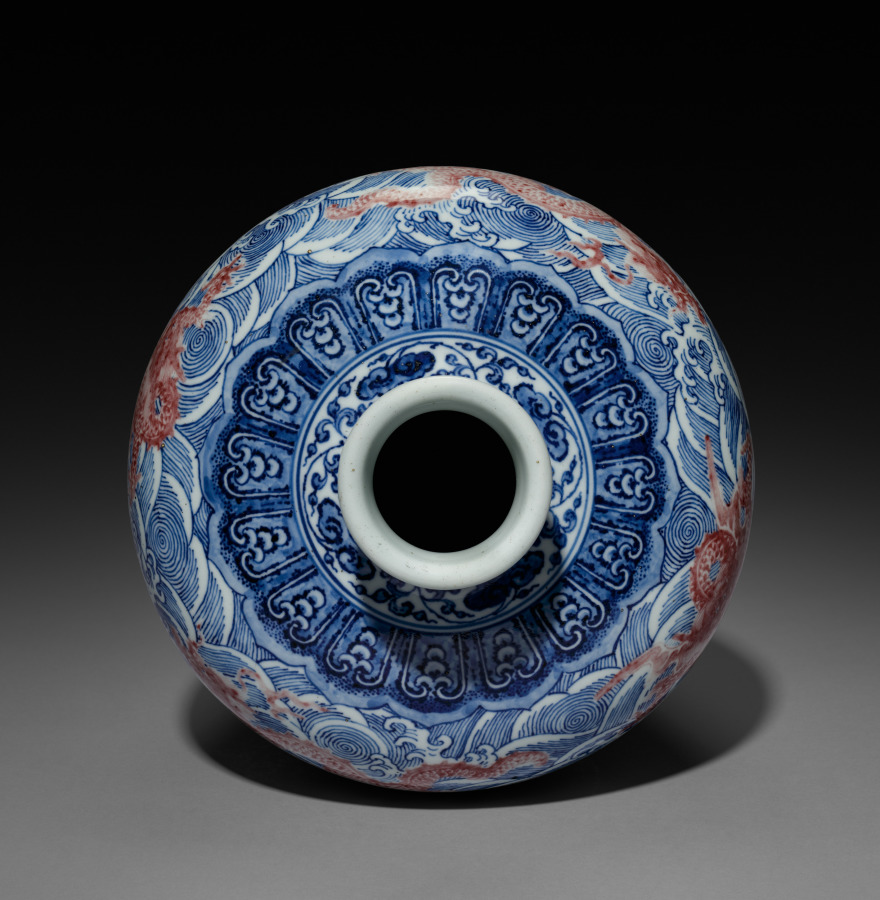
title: Bottle Vase with Dragons and Waves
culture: China, Jiangxi province, Jingdezhen kilns, Qing dynasty (1644-1911), Qianlong mark and reign (1736-95)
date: 1736–95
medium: Porcelain decorated in underglaze cobalt blue and copper red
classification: Ceramic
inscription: 大清乾隆年制